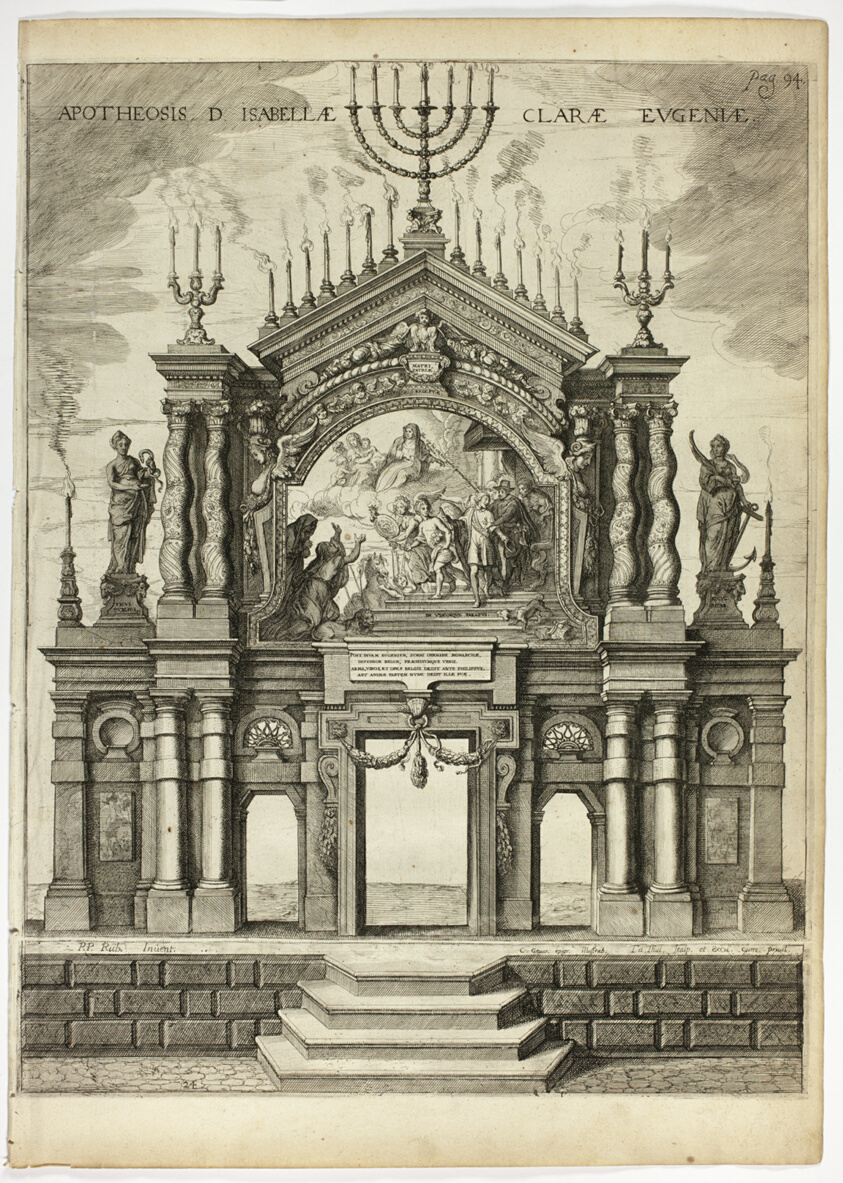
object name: Print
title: Stage in Memory of Isabella Clara Eugenia, plate 24 from Casperius Gevartius, Pompa Introitus Honori Serenissimi Principis Ferdinandi (Triumphal Entry of the Most Serene and Honorable Cardinal-Infante Ferdinand)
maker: Theodoor van Thulden (Flemish, c. 1606-1669); after Peter Paul Rubens (Flemish, 1577-1640)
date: 1642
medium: Engraving, with etching and plate tone, in black on cream laid paper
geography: Flanders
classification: engraving; paper; print; prints and drawing